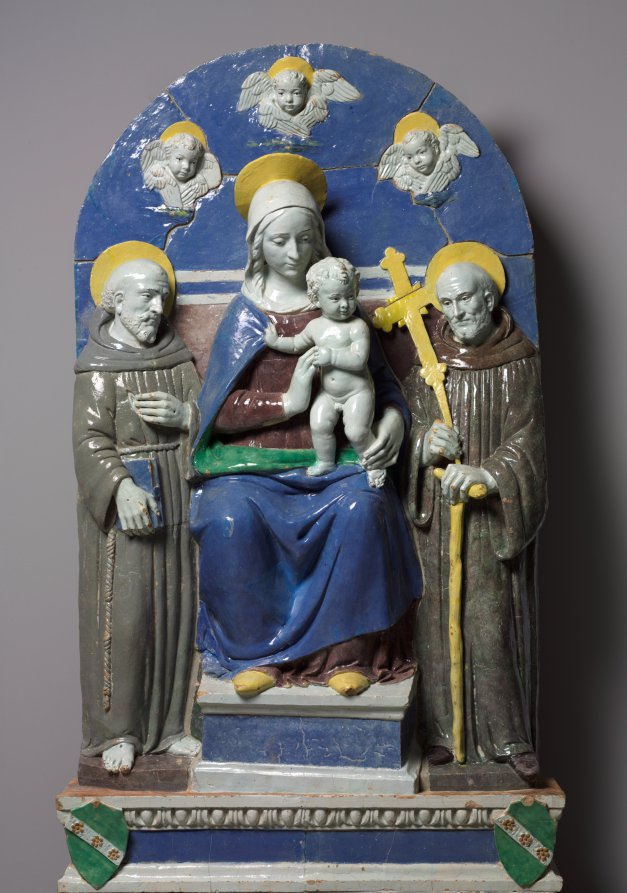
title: Virgin and Child Enthroned with Saints Francis and Giovanni Gualberto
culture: Italy, Florence, 16th century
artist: Benedetto Buglioni (Italian, 1461–1521)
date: c. 1510–20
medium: glazed terracotta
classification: Sculpture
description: The Madonna sits upon a throne with the Christ child standing on her knee. He is steadied by his mother, turning delicately to grasp her robe for support. On the left is Saint Francis, identified by his stigmata. On the right, Saint Giovanni Gualberto is identified by his monk's robe and distinctive processional cross. The brown robes of the saints, the purple of the Virgin's tunic, and the flesh tones of the figures contrast strongly against the bright blue background. In the semicircular sky behind the figures, three winged cherub heads emerge, representing a host of angels. Glazed terracotta is both durable and decorative and the gleaming white of this piece would have stood out in the darkness of a church. The medium was made popular by Renaissance artist Luca della Robbia and came into fashion as a substitute for expensive carved marble. A rounded arch frame embellished with fruit and flower garlands as well as egg-and-dart and cord moldings accompanied the work when it was acquired, but was later determined not to be original and removed. Buglioni's work bears the influence of the della Robbias, particularly in the simple color scheme. Buglioni likely worked in the studio of Luca's nephew, Andrea, where he would have learned the technique of glazing terracotta.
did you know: The unusual purple hue is particular to the artist.